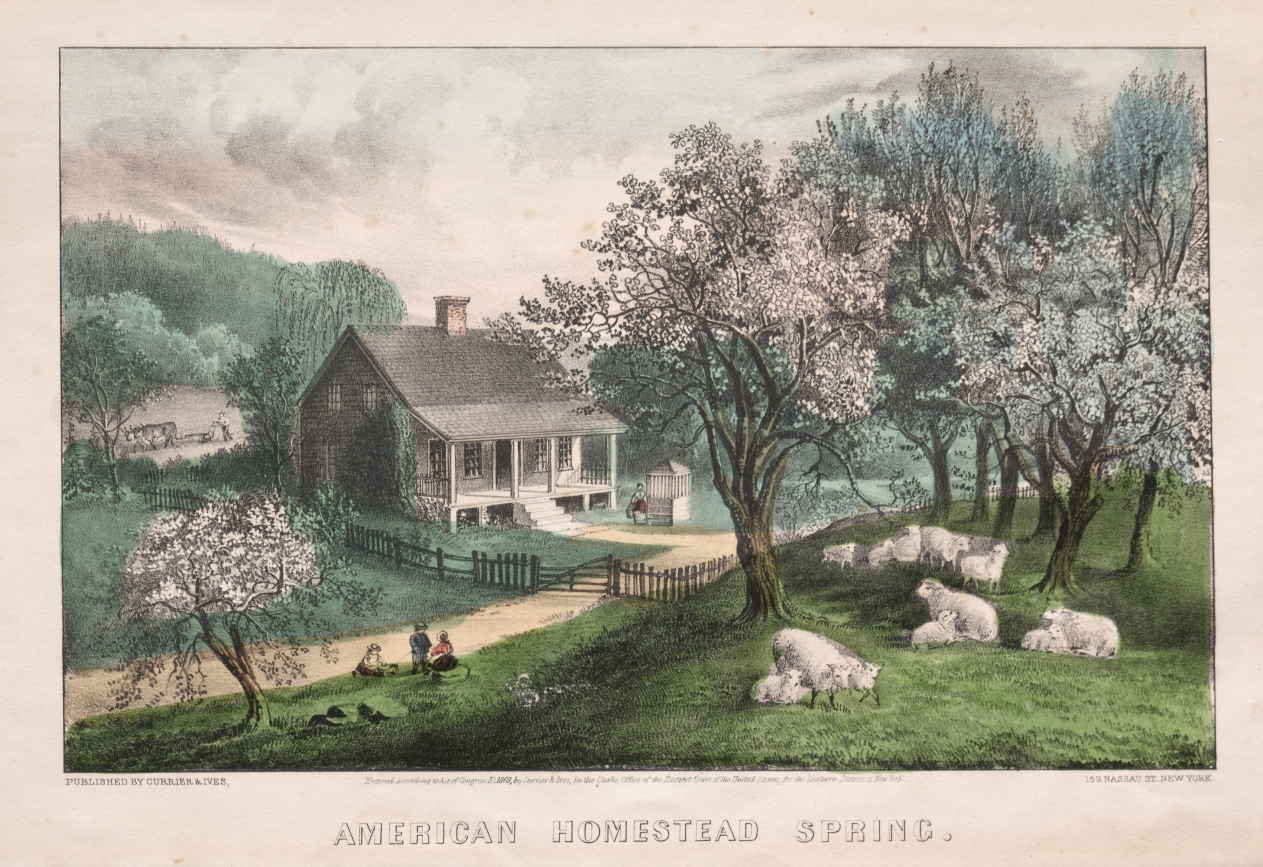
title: American Homestead, Spring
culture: America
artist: and James Merritt Ives (American, 1824–1895)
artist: Nathaniel Currier (American, 1813–1888)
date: 1869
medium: lithograph, hand colored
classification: Print